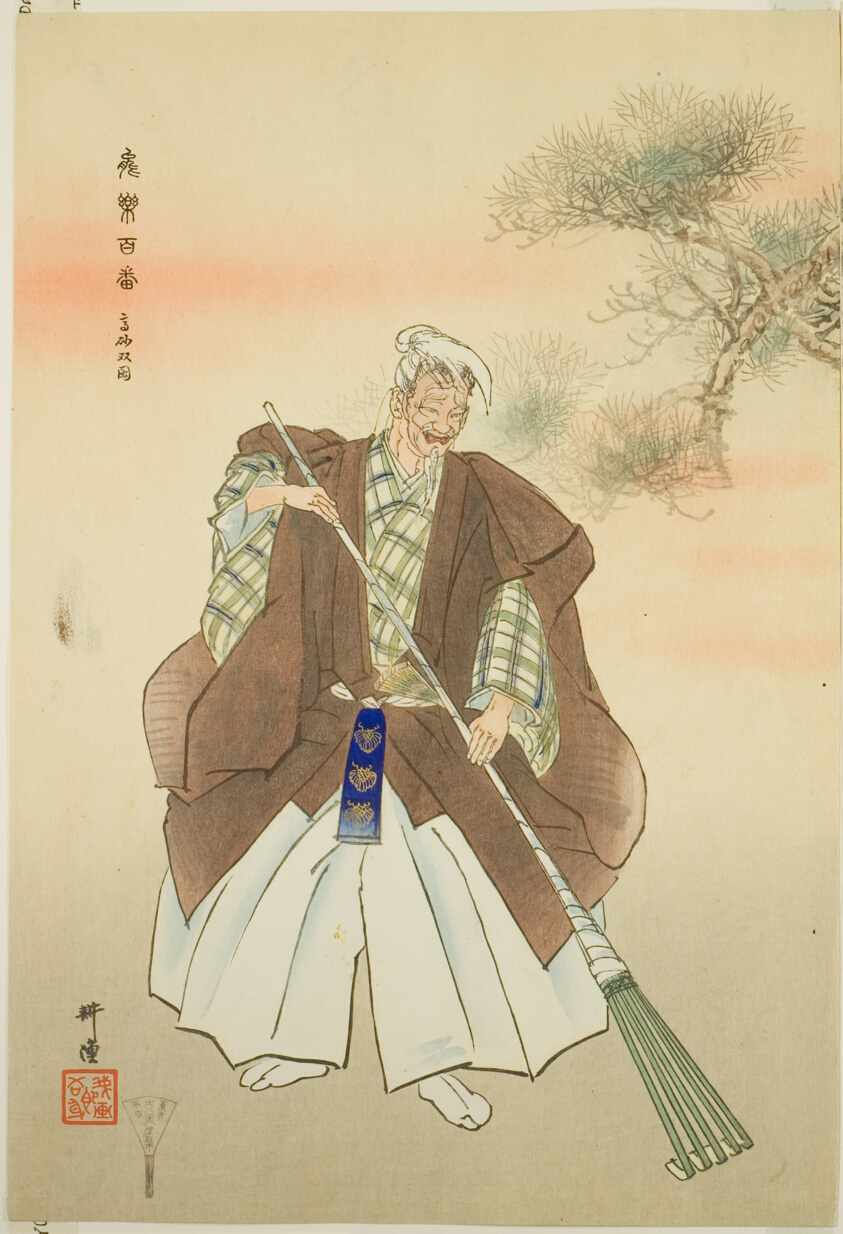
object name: Print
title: Takasago, from the series "One Hundred No Dramas (Nogaku hyakuban)"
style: Japanese (culture or style)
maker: Tsukioka Kogyo; Japanese, 1869-1927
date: 1898/1903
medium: Color woodblock print; left sheet of oban diptych (right: 1943.833.4b)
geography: Japan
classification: woodblock print; print; asian art